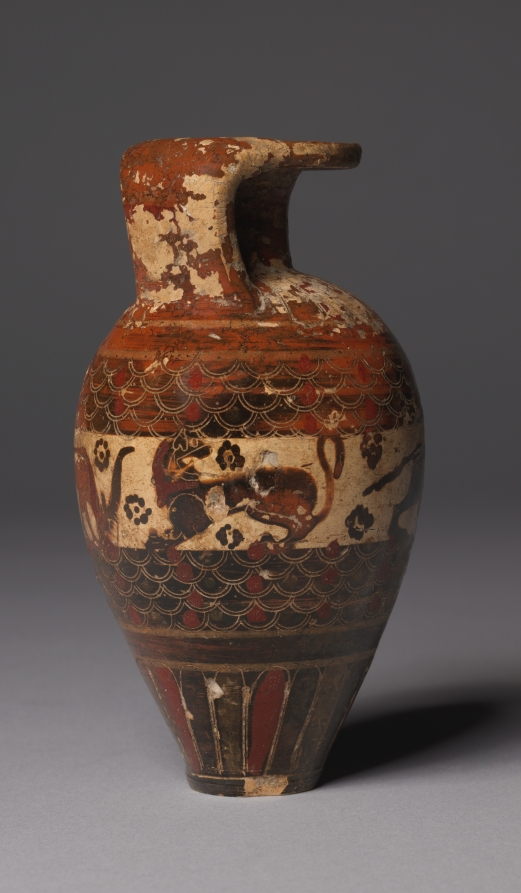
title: Protocorinthian (Early Black-Figure) Aryballos (Oil Flask): Animals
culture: Greek, Corinthian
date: c. 650–640 BCE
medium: ceramic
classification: Ceramic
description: Tongues encircle the rim, shoulder, and base of this small oil vessel, while two carefully incised bands of scales frame an animal frieze. Here, amid dot rosettes, are a bull, dog, and goat, all facing right, and a left-facing lion with head turned back. The black glaze has misfired red in many places, while added red enlivens numerous tongues, scales, and internal details.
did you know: Artists may have used a compass-like tool to create the intricate scale patterns.